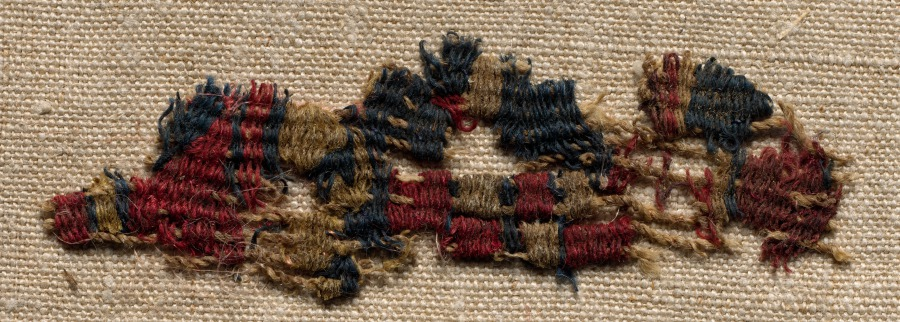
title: Wool Fragment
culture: Syria, Dura-Europos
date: 200s CE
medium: wool: tapestry weave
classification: Textile